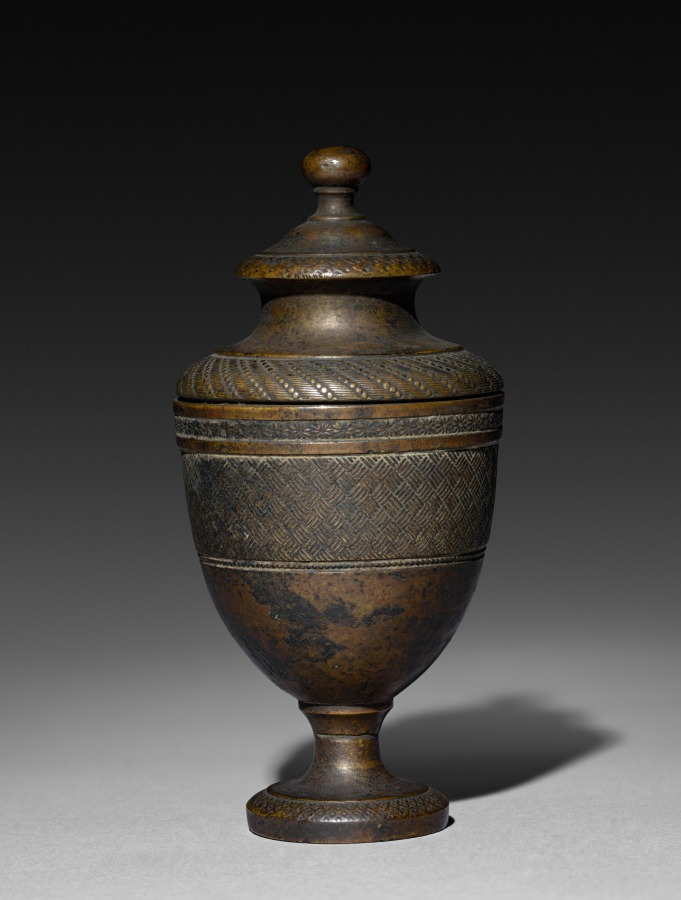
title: Ornamental Finial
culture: France, late 18th century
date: late 1700s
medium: bronze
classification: Metalwork